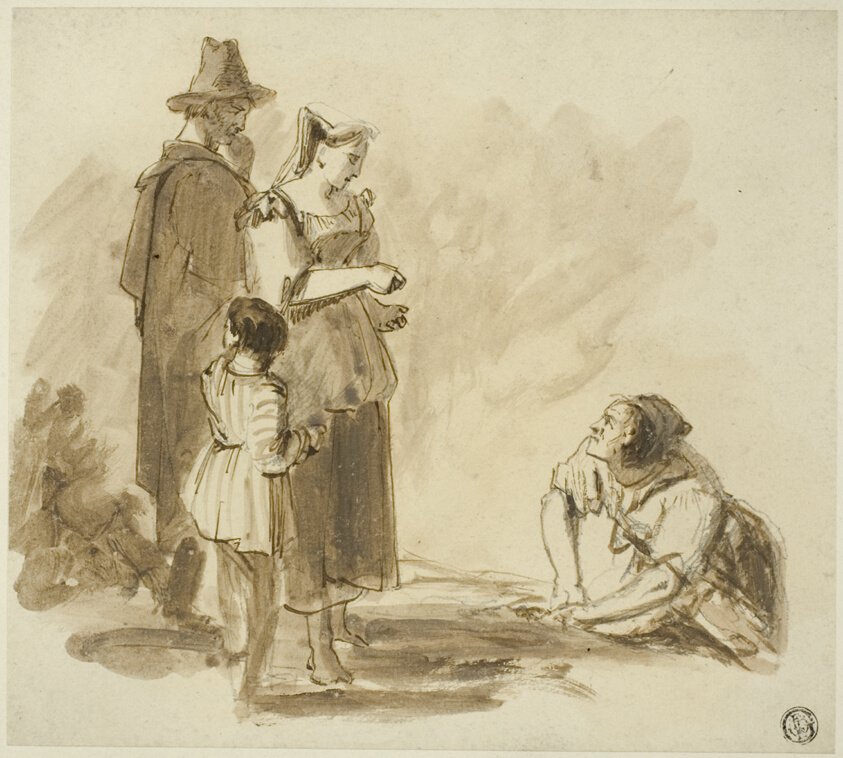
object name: Drawing and Watercolor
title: Four Peasants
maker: Augustus Wall Callcott (English, 1779-1844)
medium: Pen and brown ink with brush and brown wash, over graphite, on ivory wove paper, laid down on card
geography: England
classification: pen and ink drawings; drawings (visual works); prints and drawing